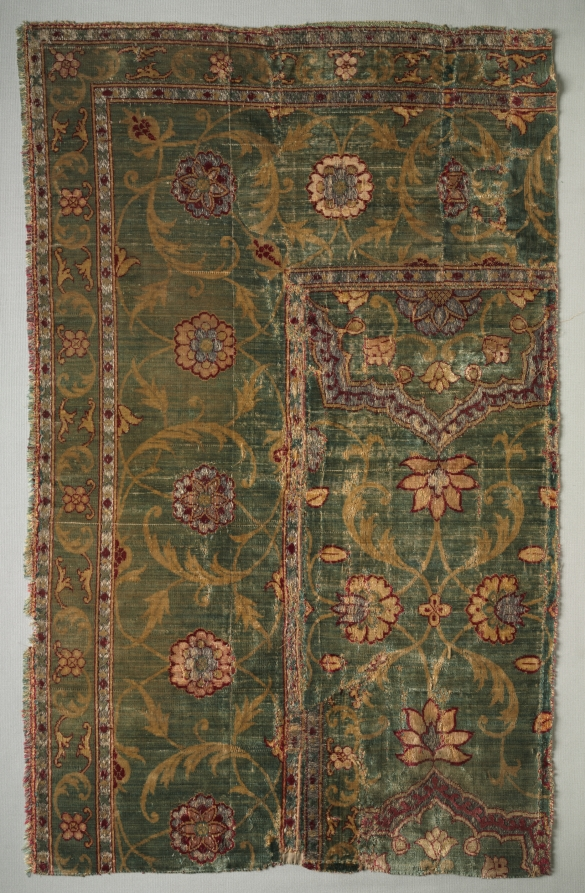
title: Fragment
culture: India, 17th century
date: 1600s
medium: velvet (brocaded); silk and metal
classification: Velvet